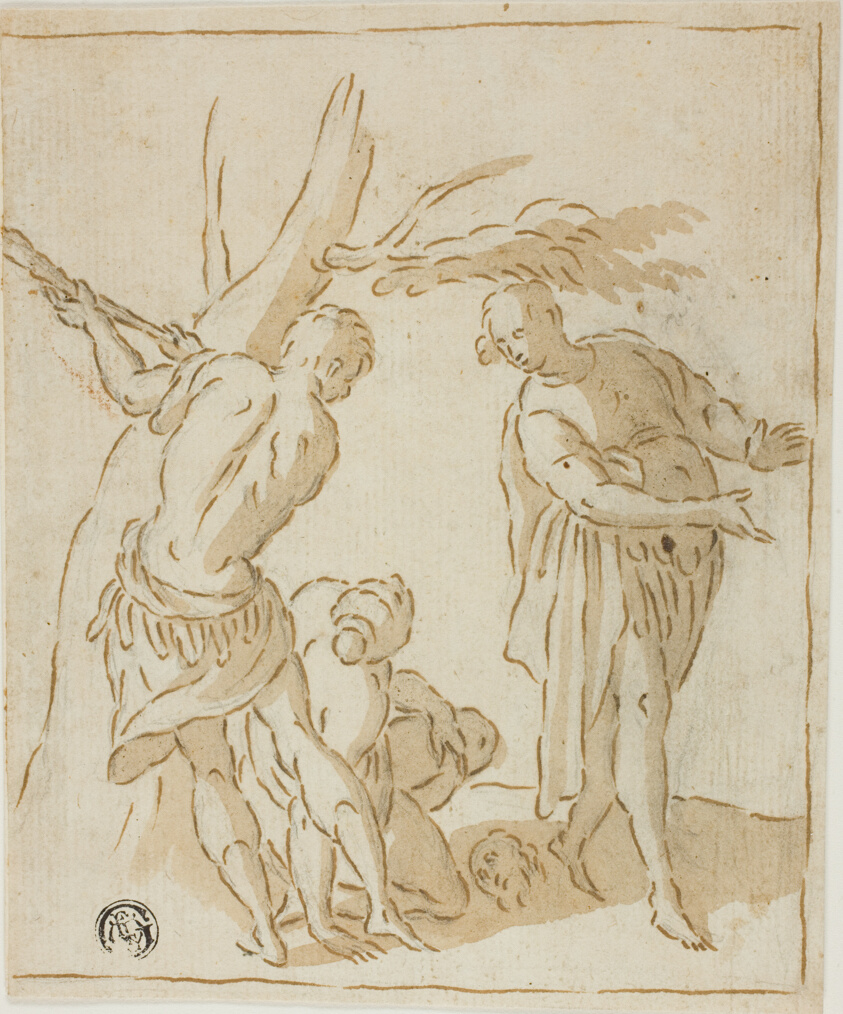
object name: Drawing and Watercolor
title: Three Figures with Severed Head on Ground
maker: Circle of Marcantonio Bassetti (Italian, 1586-1630)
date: 1600/20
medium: Pen and brown ink with brush and brown wash, over graphite, on cream laid paper, laid down on buff laid paper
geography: Italy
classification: pen and ink drawings; drawings (visual works); prints and drawing